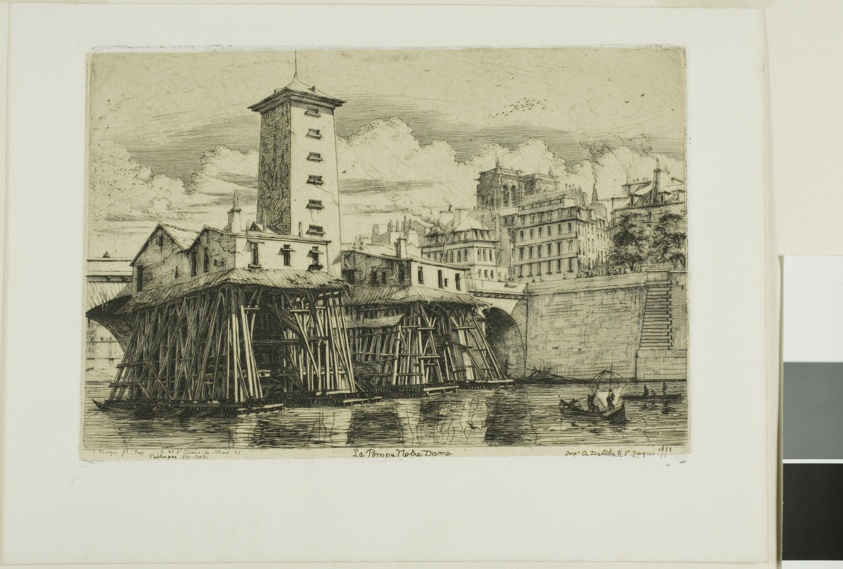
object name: Print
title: La Pompe Notre-Dame, Paris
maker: Charles Meryon (French, 1821-1868); printed by Auguste Delâtre (French, 1822-1907); published by L'Artiste (French, 1831-1904)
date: 1852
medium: Etching with drypoint on tan wove chine, laid down on ivory wove paper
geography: France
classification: etching; print; prints and drawing